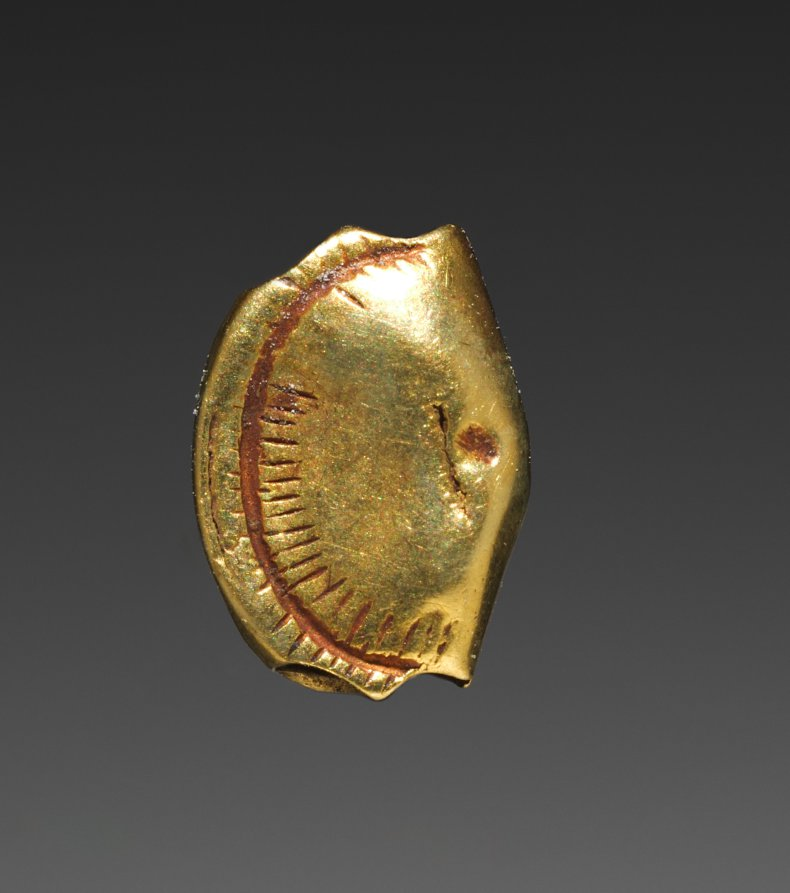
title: Wallet Bead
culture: Egypt, New Kingdom (1540–1069 BCE), Dynasty 18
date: 1540–1296 BCE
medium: gold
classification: Jewelry